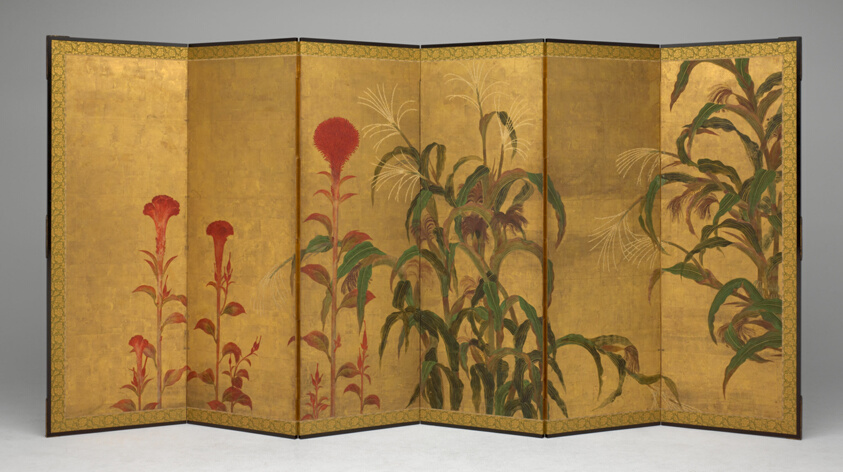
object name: Painting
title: Maize and Cockscombs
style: Japanese (culture or style), edo (japanese period)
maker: Artist unknown; Japanese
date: mid 17th century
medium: Six-panel screen; ink, color, and gold on paper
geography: Japan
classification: screen; painting; asian art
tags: cornstalks, cockscombs, plants, flowers, gold (color)